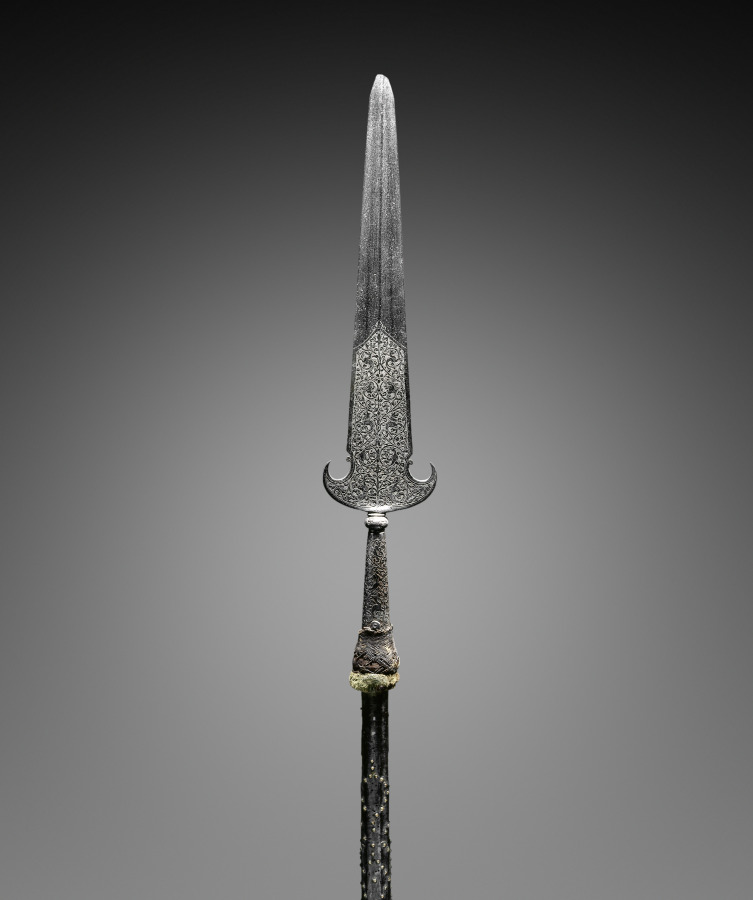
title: Partisan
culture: France, 17th century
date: c. 1600–50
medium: steel, etched; octagonal wood haft with studs and leather; remnants of velvet tassel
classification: Arms and Armor